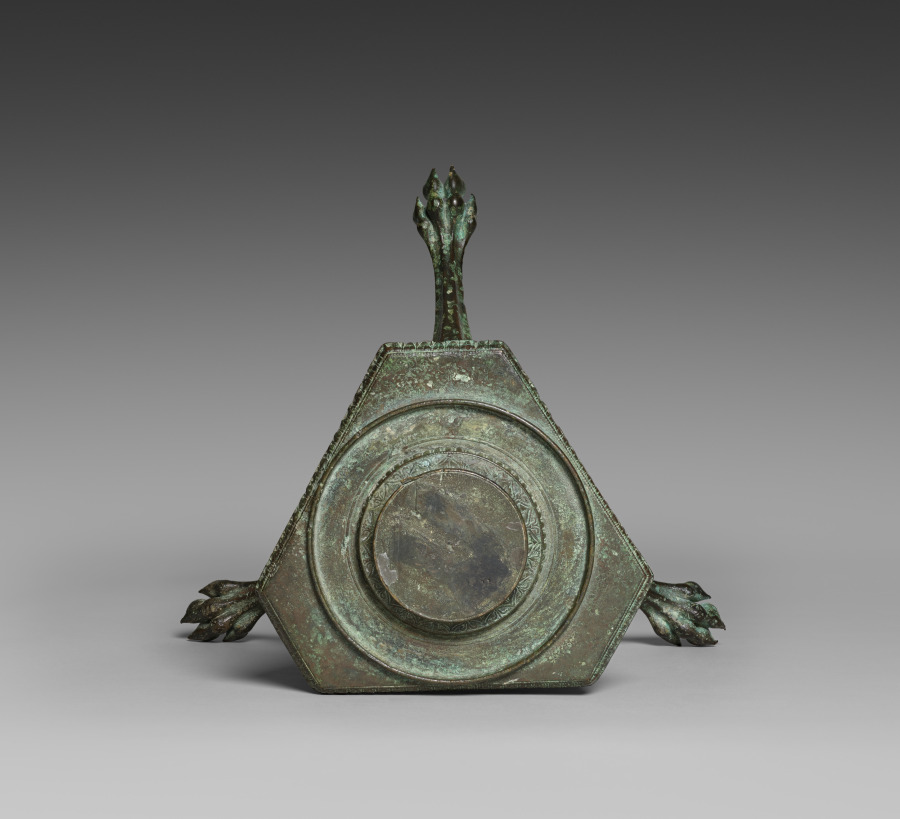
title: Tripod Base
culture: Italy, Roman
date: 100–1 BCE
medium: bronze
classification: Sculpture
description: This unusual tripod base features three clawed feet, an abundance of vegetal ornament, and three different figural scenes in low relief. Two seem to show sanctuary settings: first, a small Archaistic statue of Athena flanked by a woman with small offerings and a man holding a kid and leading two goats; and second, a small youthful male statue behind two beardless figures—perhaps Apollo, with a stag, and Dionysos, holding a thyrsos. The third scene shows Herakles, holding a club while leading a woman, maybe Auge or Alcestis. Although perhaps similarly eclectic in style, the base and the sculpture it now supports differ in their alloys and patinas.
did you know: This elaborate base may have originally supported an ornate lamp (not the statuette now displayed atop it).